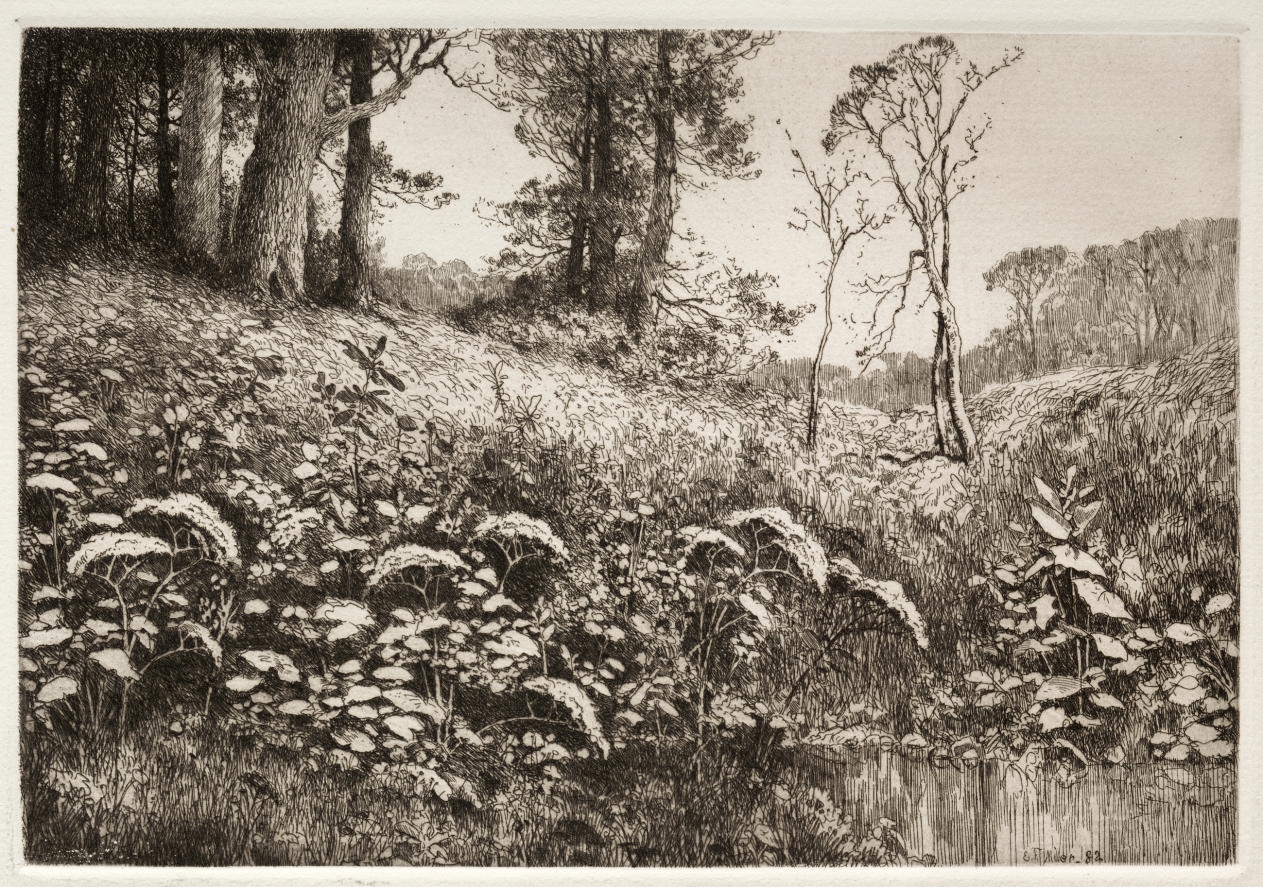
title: A Summer Afternoon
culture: America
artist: Elis F. Miller (American)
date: 1882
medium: etching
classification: Print